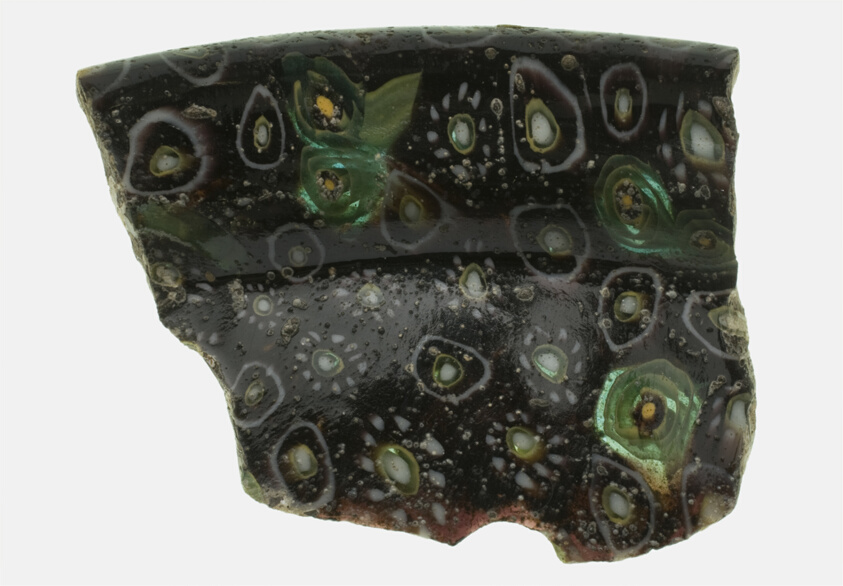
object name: Decorative Arts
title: Fragment of a Cup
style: ancient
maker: Roman or Eastern Mediterranean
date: 1st century BCE–1st century CE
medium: Glass, mosaic technique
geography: Roman Empire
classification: fragment; decorative arts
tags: decoration